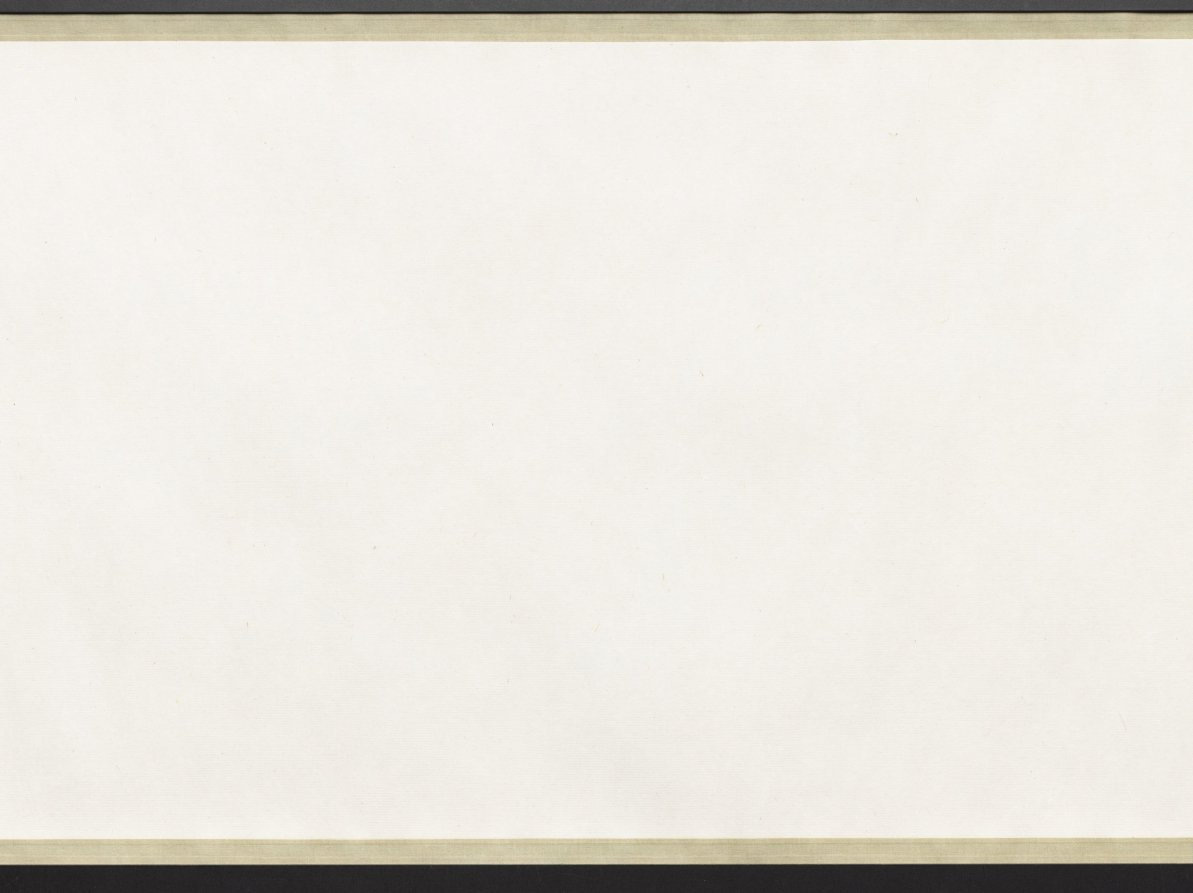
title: A Hundred Sparrows in a Lofty Grove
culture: China, Ming dynasty (1368–1644)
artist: attributed to Lin Liang (Chinese, 1416–1480)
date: 1368–1644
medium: handscroll; ink on silk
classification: Painting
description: Sparrows engaged in all kinds of activities frolic amid leafy branches, blades of grass, rocks, and a waterfall. As our eyes move over the scroll, the artist engages us in enjoying the sparrows’ carefree movements in a natural setting. The charming birds were painted from close observation in swift and fluent brushstrokes. Sparrows are a common bird and in Chinese painting they often represent the commoner in human society as opposed to the noble pheasant or peacock representative of the ruling class.